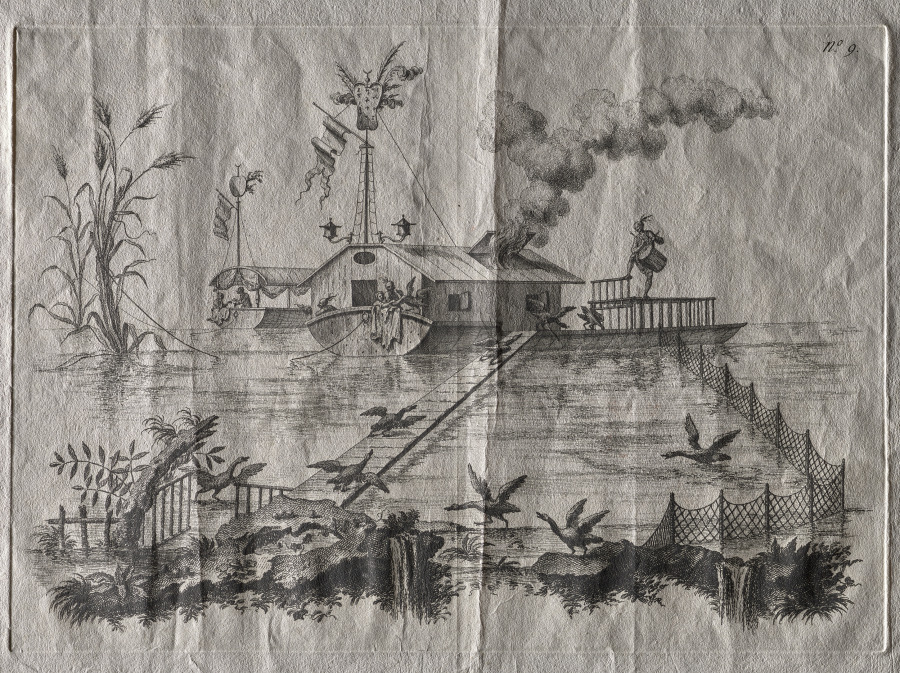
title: A House on Water, and a New Way to Summon Geese by the Beat of a Drum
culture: Italy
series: Suite of the Most Notable Things Seen by John Wilkins Erudite English Bishop during His Famous Voyage from the Earth to the Moon … dedicated to Sir William Hamilton ambassador to the Court of Naples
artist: Filippo Morghen (Italian, 1730–after 1807)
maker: possibly after Jean-Pierre-Louis-Laurent Hoüel (French, 1735–1813)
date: about 1769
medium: etching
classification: Print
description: Filippo Morghen’s set of 10 etchings is outstanding among visual narratives of imaginary voyages to the moon, both visual and literary, that intrigued 18th-century European audiences. A title page and nine plates depict the imagined lives and economy of moon dwellers. These include modes of transport such as large birds and sailboats propelled by giant bellows, enormous scissors for capturing wild beasts (including an oversized rat), and the use of giant pumpkins as fishing boats and as dwellings. Representations of the moon dwellers are based on inaccurate and imaginary European interpretations of Asian, Ottoman, and Native American cultures—called chinoiserie and turquerie—that permeated the decorative and visual arts of the period.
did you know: Morghen based this print series on three books dedicated to moon exploration, including Bishop Francis Godwin’s, Man in the Moone, 1640.